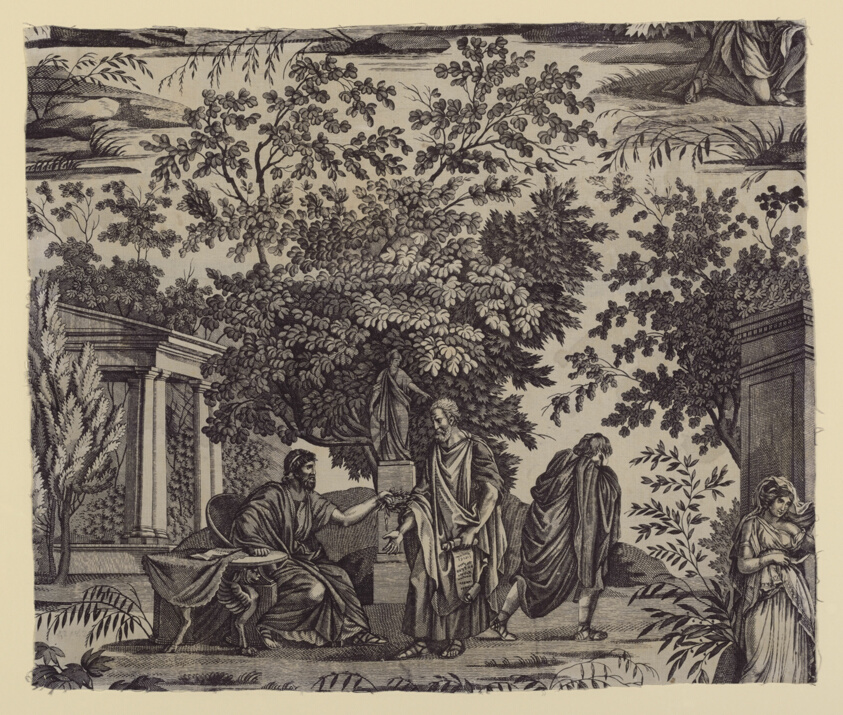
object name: Textile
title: Achille reconnu par Ullysse (Achilles Recognized by Ulysses) (Furnishing Fabric)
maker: Manufactured by Favre-Petitpierre et Cie. (French, 1802-1818); France, Nantes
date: c.1798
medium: Cotton, plain weave; copperplate printed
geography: Nantes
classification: textile; weaving - printed; furnishing textile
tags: mythology